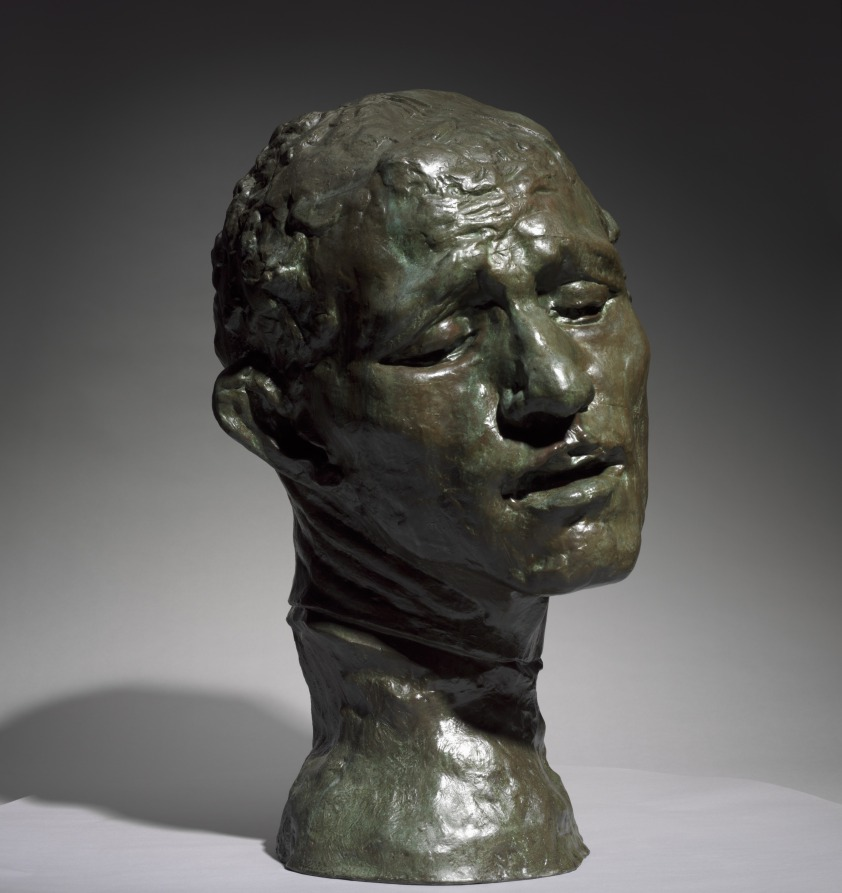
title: Heroic Head of Pierre de Wissant, One of the Burghers of Calais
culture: France, 19th century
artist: Auguste Rodin (French, 1840–1917)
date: 1886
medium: bronze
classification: Sculpture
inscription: inscribed at neck, left: A.Rodin; inscribed lower back: Alexis Rudier/Fondeur-Paris.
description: This sculpture depicts one of the figures in Rodin’s large public monument The Burghers of Calais (1884–89), featuring six French men who volunteered to be taken prisoner by the English in exchange for lifting the siege of Calais during the Hundred Years War (1337–1453). Pierre de Wissant’s anguished expression suggests extreme mental suffering as he contemplates his expected execution. Rodin exhibited a life-size version of the figure as an independent work before completing the monument. He later made multiple versions in various sizes and media.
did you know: This sculpture depicts the head of a figure from Rodin's large public monument The Burghers of Calais (1884-89). The CMA also owns a plaster version of the head.